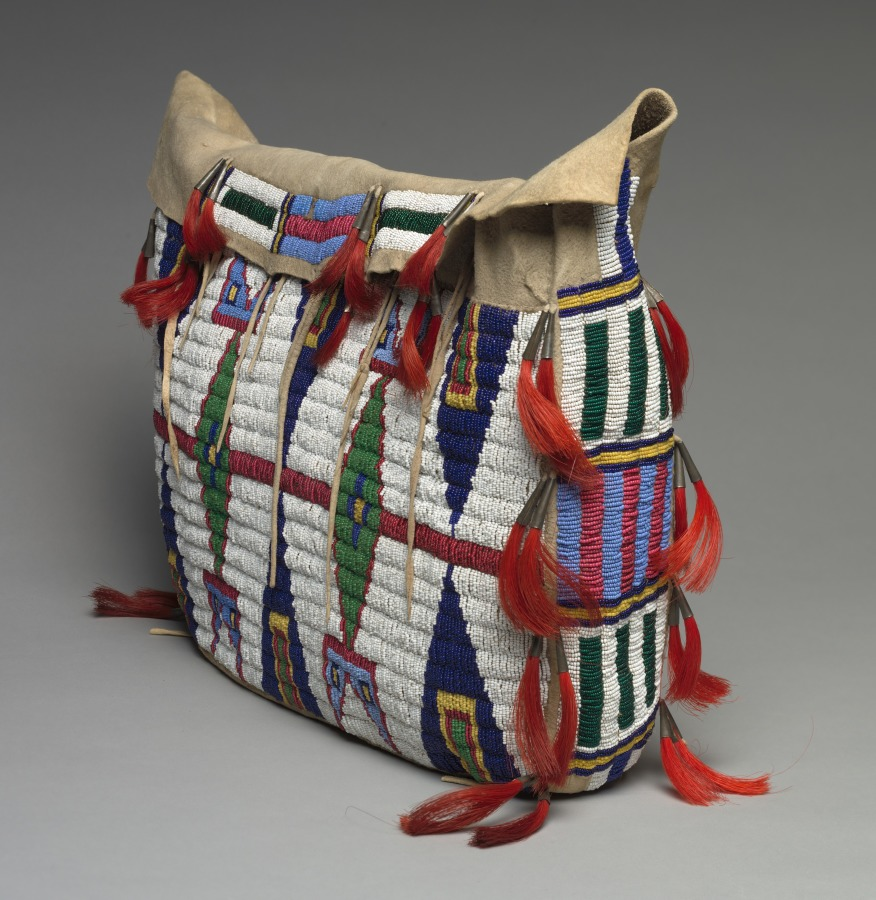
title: Storage Bag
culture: Native North America, Plains, Lakota (Sioux)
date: late 1800s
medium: Native-tanned hide, glass beads, dyed horsehair, tin cones, sinew thread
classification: Leather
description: Rectangular bags made of soft hide—known among early white traders as “possible bags” because they could hold “anything possible”—were used to store personal items inside the tipi, where they doubled as pillows. When encampments moved, the bags were carried on the side of a saddle, where their decoration could be admired.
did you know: Bags like this were used to store personal items inside the tipi, where they doubled as pillows.